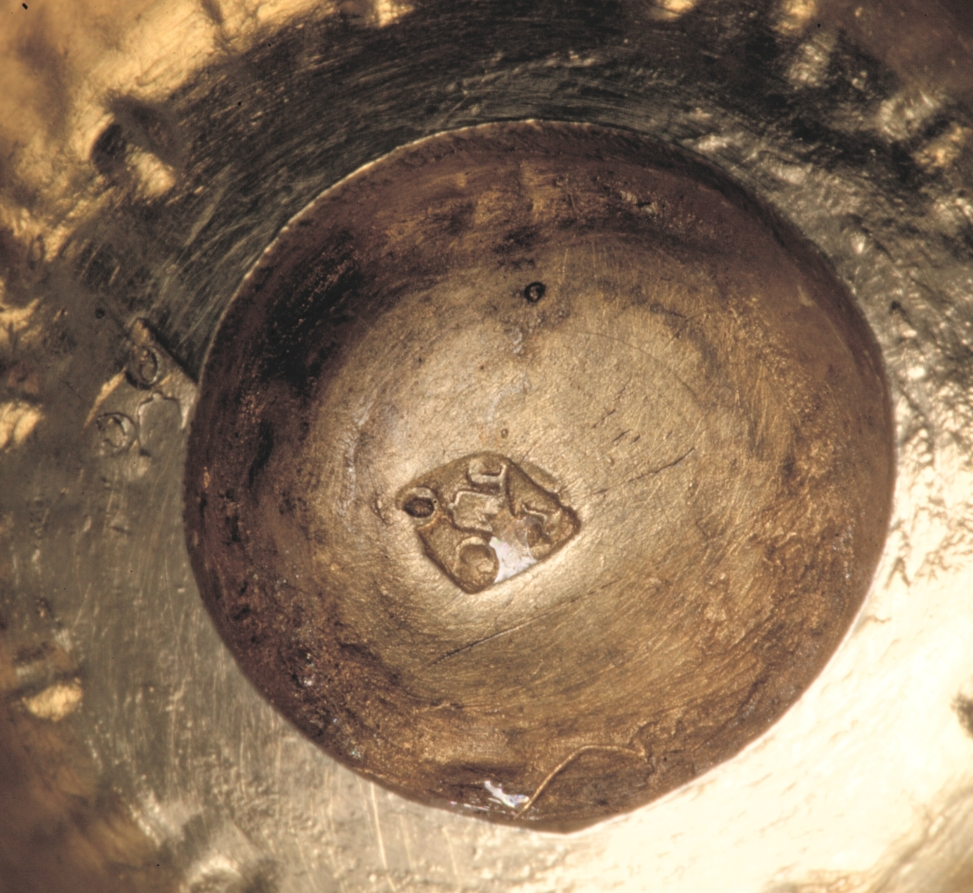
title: Ewer (aiguière)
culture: France, 19th century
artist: Jean Baptiste Claude Odiot (French)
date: c. 1817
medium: silver gilt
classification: Silver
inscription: [Excise mark for medium-sized work, Paris, 1809-1819, on edge of base]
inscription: [Two maker's marks of Jean-Baptiste-Claude Odiot after the Revolution, inside foot]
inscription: [Official assay mark for first standard silver, Paris, 1809-1819, near exterior upper rim]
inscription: [Applied coat of arms of the count Alfred de la Chapelle, Seigneur of Morton and Beaulieu, Périgord “accolé” with an alternate version of de la Chapelle, exterior of foot]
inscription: [Struck twice, interior foot]: "ODIOT"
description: Jean-Baptiste-Claude Odiot’s reputation stretched internationally. Commissioned by Russian count Nikolei Demidoff, this ewer was one part of an extensive silver dinner service. Decorated with motifs of classical antiquity, this object’s Greco-Roman silhouette, grape vine frieze, raised mythological figures, and sinuous swan’s neck handle were likely inspired by the designs of Charles Percier and Pierre-François Fontaine, architects of Napoleon I.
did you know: The coat of arms on the foot of this ewer belongs to the count Alfred de la Chapelle who owned this silver dinner service during the second half of the 19th century.